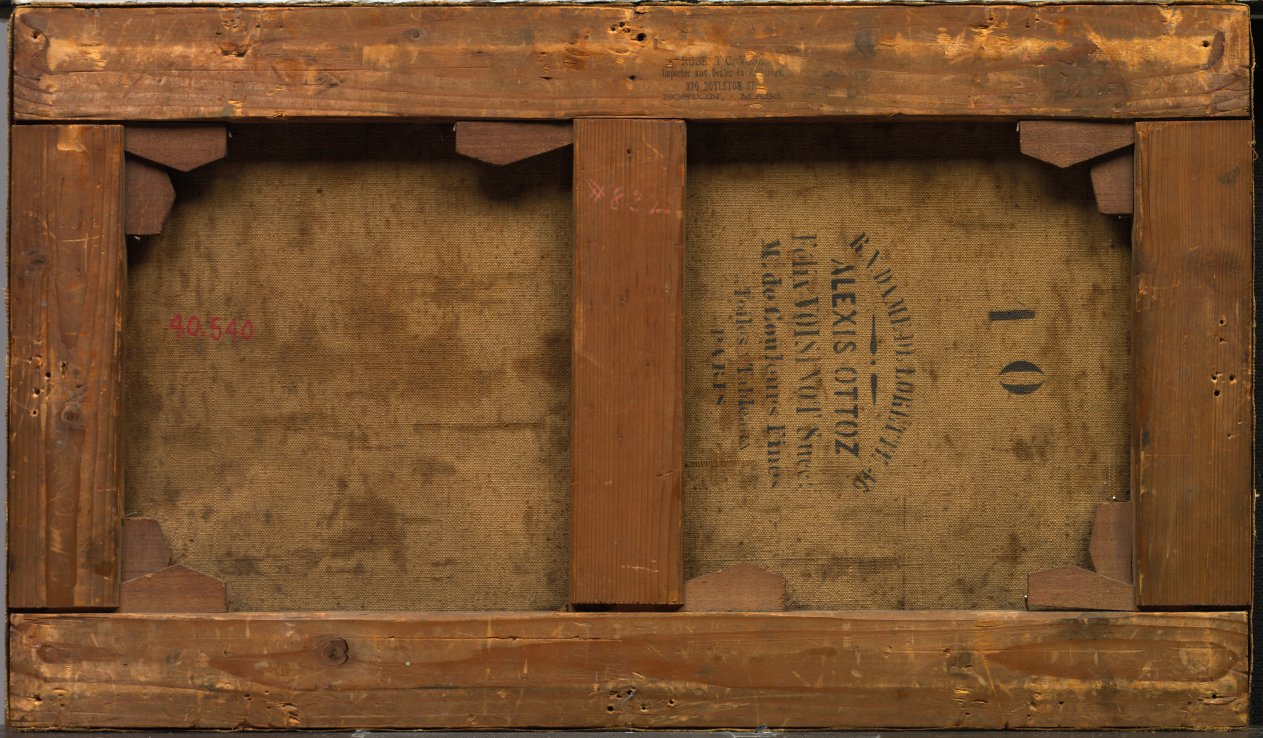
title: Banks of the Seine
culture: France, 19th century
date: not dated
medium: oil on fabric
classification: Painting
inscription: Signed lower left: E. Boudin [originally done in brown paint; has been abraded and reinforced in black]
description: Although this scene was once thought to have been painted by Eugéne Boudin (1824–1898), its creator has yet to be identified.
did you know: The Seine River, especially the mid-Seine valley where Claude Monet lived, is known for being a source of inspiration and subject matter for Impressionist and Post-Impressionist artists.